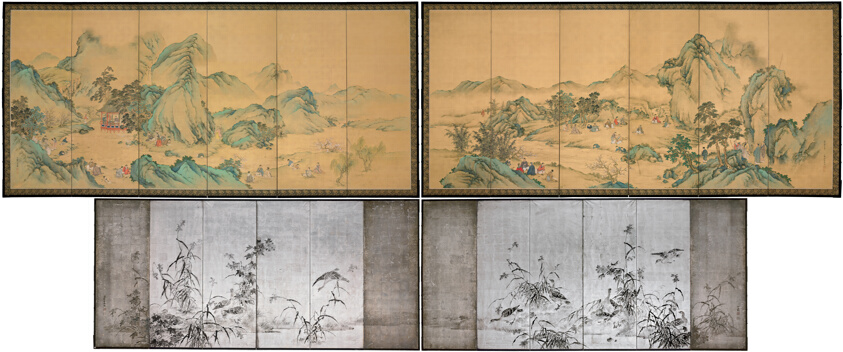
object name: Painting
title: The Gathering at the Orchid Pavilion (front); Geese among Reeds (back)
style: Japanese (culture or style)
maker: Noguchi Shohin (Japanese, 1847-1917)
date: 1900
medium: Pair of six-panel screens; ink, colors, and gold on silk (front); ink and silver on paper (back)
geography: Japan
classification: screen; painting; asian art